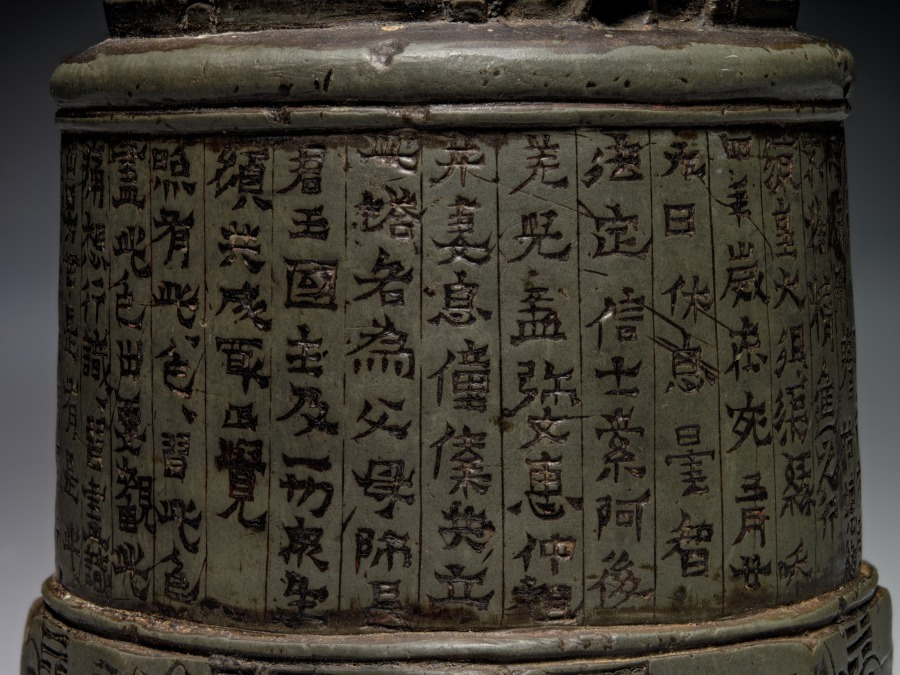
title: Miniature Votive Stupa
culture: China, Gansu province, Northern Wei dynasty (386-534)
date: 435 CE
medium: steatite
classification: Sculpture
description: This sutra pillar, inscribed with a sacred Buddhist text, belongs to a group of miniature stupas (jingta) that were found exclusively in the Gansu corridor, Northwest China. Ranging in date between AD 426–36, some of them bear the names of the lay Buddhist donors who commissioned them. A stupa is an architectural round structure built for the veneration of Buddhist relics. Miniature stupas may have commemorated the visit of a sacred site or represented donations to religious communities and sites.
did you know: There are trigrams, three horizontal lines, broken or continuous, above each of the eight bodhisattvas in the stupa's lower section.